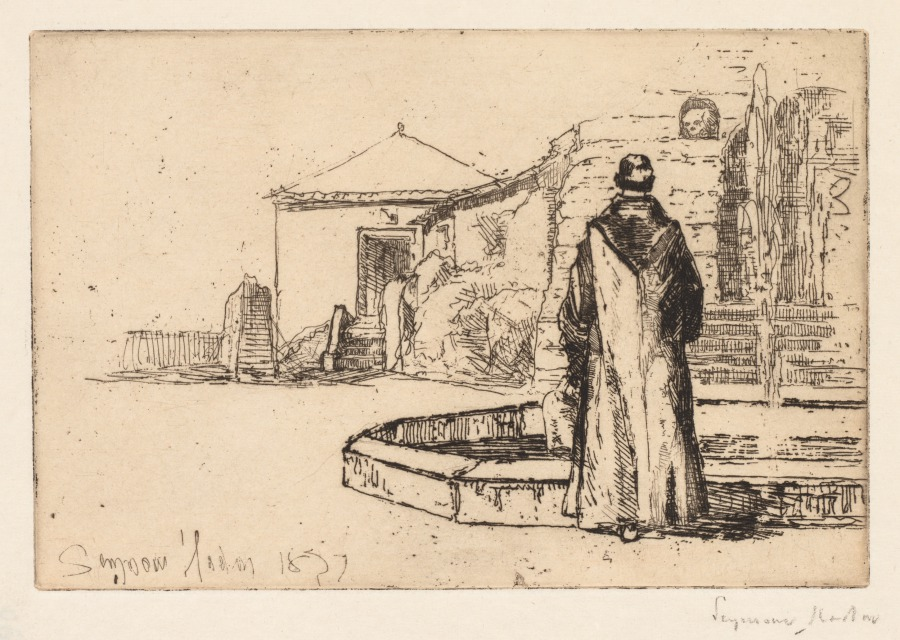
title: Monk at a Fountain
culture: Britain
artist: Francis Seymour Haden (British, 1818–1910)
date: 1877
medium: etching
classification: Print